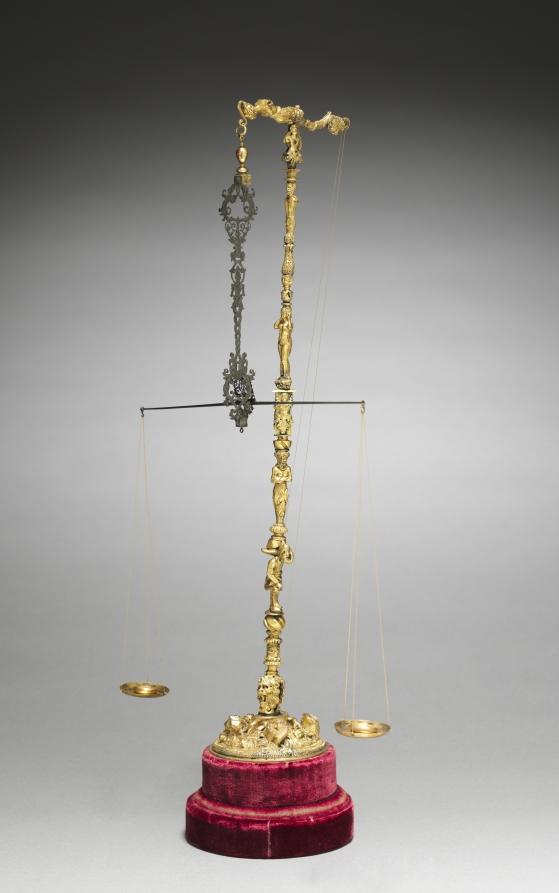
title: Scales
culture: Germany, Nuremberg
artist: workshop of Wenzel Jamnitzer I (German, 1508/09–1585)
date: c. 1525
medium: gilt bronze and silver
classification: Metalwork